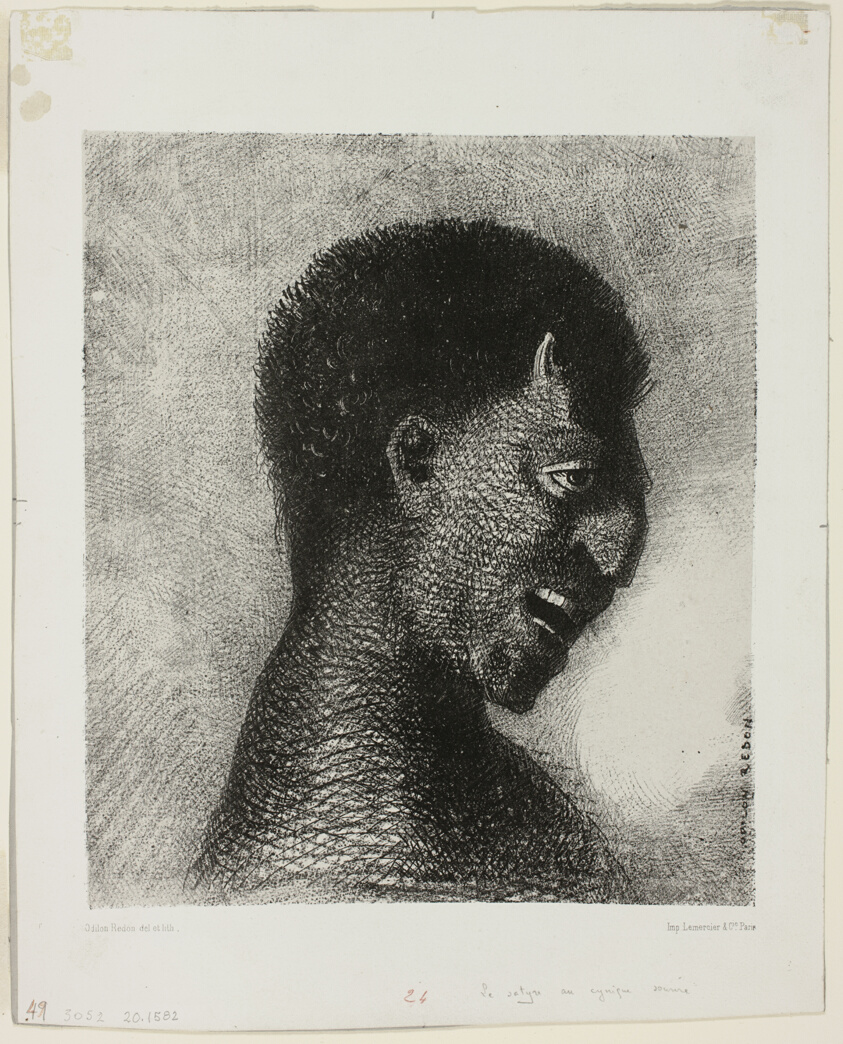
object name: Print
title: The Satyr with the Cynical Smile, plate 5 of 8 from "Les Origines"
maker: Odilon Redon (French, 1840-1916)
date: 1883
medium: Lithograph in black on light gray China paper, laid down on white wove paper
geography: France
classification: lithograph; print; prints and drawing; paper